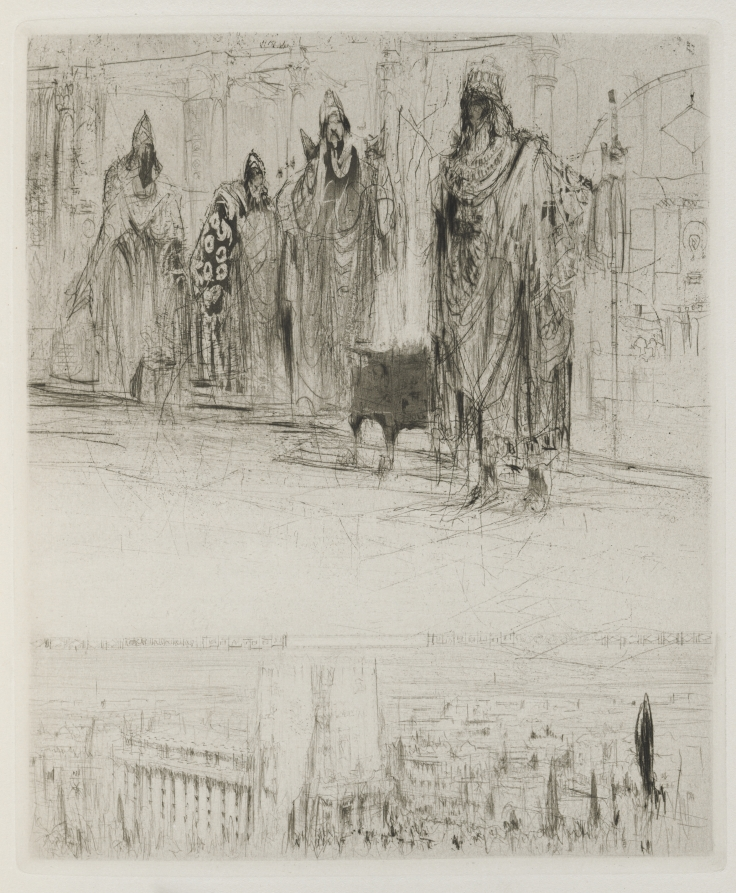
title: Herodias: Page 13, The tetrarch was awaited by several Galileans, the master of scribes, the chief of the land steward, the manager of the salt mines, and a Jew from Babylon commanding his troops on horse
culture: England, 20th century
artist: William Walcot (British, 1874–1943)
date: 1928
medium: etching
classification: Print